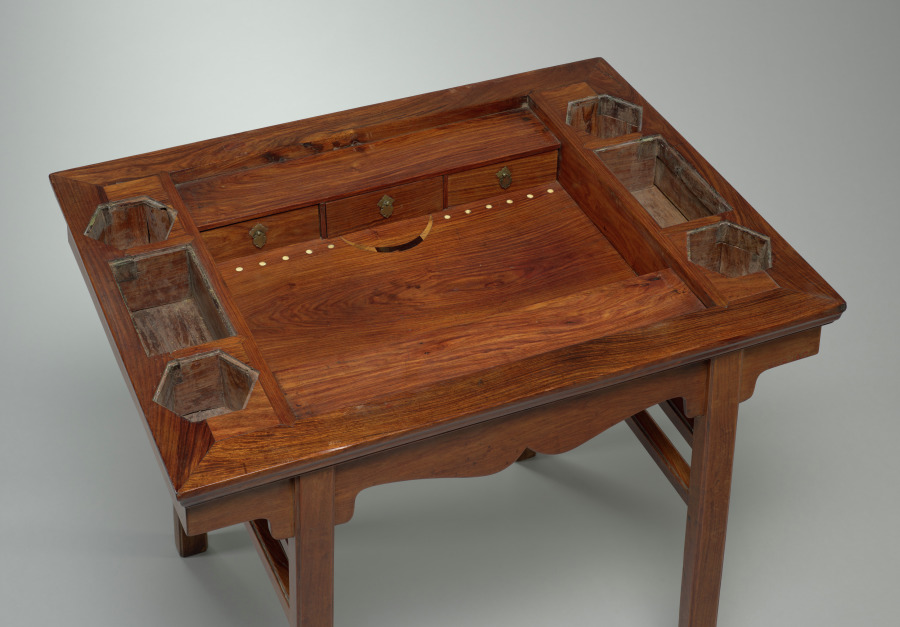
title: Game Table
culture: China, Ming dynasty (1368-1644) - Qing dynasty (1644-1911)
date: 1600s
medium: Rosewood (huanghuali)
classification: Furniture and woodwork